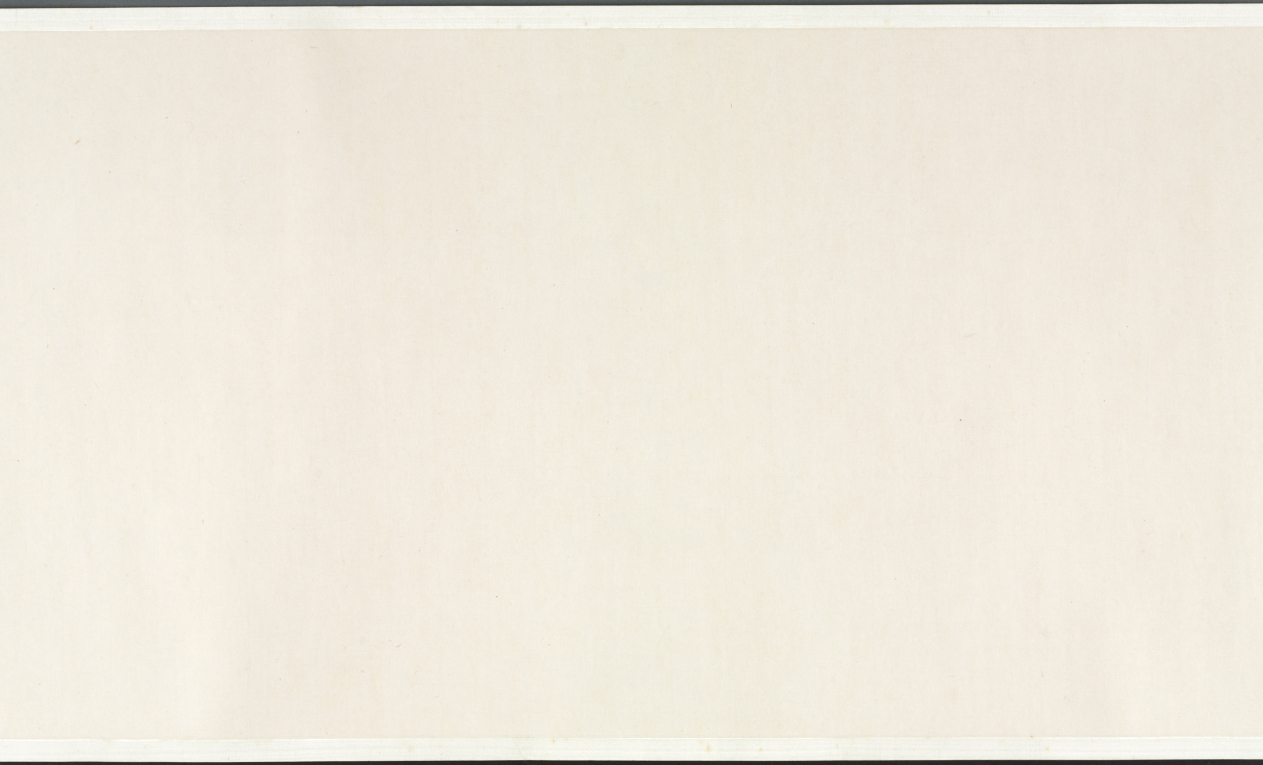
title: Buddha's Conversion of Five Bhiksu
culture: China, Yuan dynasty (1271–1368)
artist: Li Sheng (Chinese, active c. 1324–after 1375)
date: mid-1300s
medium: handscroll; ink on paper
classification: Painting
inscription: 紫篔生李升識 [印] 李氏子雲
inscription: 4 colophons and 12 additional seals: The "Heart" Sutra (Maha Prajnaparamita) text written by Wu Yuqing 吳餘慶 (active early 1400s); 2 seals of Xu Qianxue 徐乾學 (1631–1694); 3 colophons, one dated 1929 and two dated 1936, and 9 seals of Wu Hufan 吳湖帆 (1894–1968); 1 colophon, dated 1932, of Chen Dingshan; 1 seal unidentified.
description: This episode stems from the life of the historical Buddha, who, after his enlightenment, was initially hesitant about preaching his own doctrine. After much personal deliberation and prodding by deities, he finally relented. The first converts were the five guards who served him when he was still a prince. For Li Sheng, this is the pretext of the painting, which moves from the interaction of the bhiksu with the Buddha to a broader awareness of the vast surroundings of the scene.